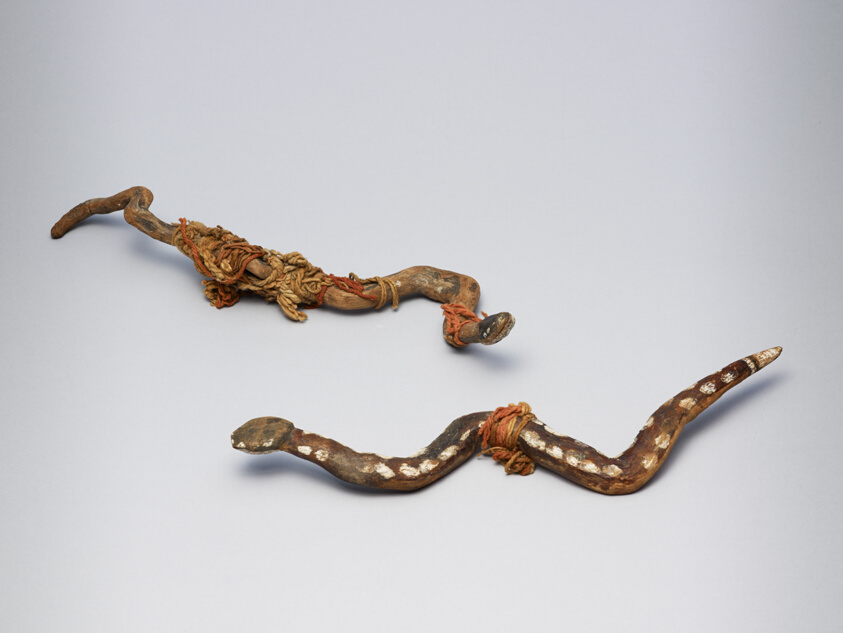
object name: Religious/Ritual Object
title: Ritual Cache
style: salado, mimbres, mogollon, americas, southwest, native american, native north american, Arts of the Americas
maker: Salado branch of the Mogollon; New Mexico, United States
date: 1300–1400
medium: Wood, stone, plant fibers, cotton, feathers, hide, and pigment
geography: New Mexico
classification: ceremonial object; ceramics; masks; ritual objects; art of the americas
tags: ceremonial objects, figures (representations), snakes, ritual objects, mountain lions, indigenous, nature, altar, offering, feathers, corn, lightning, fertility, supernatural, basketry, hunting